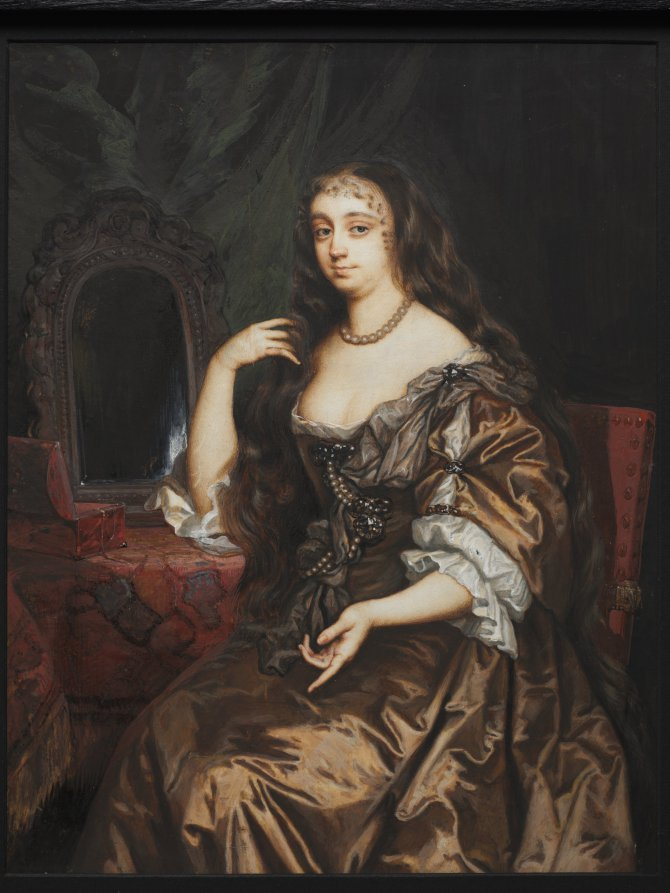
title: Portrait of Anne Hyde, Duchess of York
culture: England, 17th century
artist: Nicholas Dixon (British, c. 1708)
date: c. 1662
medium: watercolor on vellum in a large wooden frame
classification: Portrait Miniature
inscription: Label inside of back: Henry J. Murcott, London. Written in ink on backing: "Anny Hyde, first Wife of James II, Mother of Queen Mary II, Queen Anne. From Lord Currie's collection."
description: Though knowledge about his birth and training remain obscure, Nicholas Dixon is known to have been a favorite miniature painter of the English court at the close of the seventeenth century. He succeeded Samuel Cooper (1608/9–1672) as limner to King Charles II in 1673 and was Keeper of the King’s Picture Closet, for which he was granted an irregularly paid annuity of £200. Dixon painted a substantial number of ambitiously scaled miniatures—which became increasingly uncommon among practitioners of the art form when the more constrictive support of ivory supplanted vellum in the early 1700s. Dixon often signed his work with the monogram ND, and many of his large cabinet miniatures were copies of portraits, religious scenes, and mythological paintings by old masters, thirty of which formed part of the collection of the dukes of Portland. Among the characteristics of his style are ruddy flesh tones and drowsy eyes, and like the work of John Hoskins (c. 1590–1665), who may have been his teacher, Dixon favored softer modeling and diffuse lighting of his subjects, as opposed to the dramatic shadows employed by Cooper. Two lottery schemes—one in 1684/85 and the other in 1698— involving the exhibition of miniatures and the distribution of cash prizes proved disastrous for Dixon, who was in financial ruin by 1700 and constrained to sell a large number of works from the lottery. Anne Hyde (1637–1671), the sitter in this portrait, was around the age of twenty-four when the miniature was painted. She faces right and sits upon a dull red chair before a dressing table covered with a deep red embroidered cloth or tapestry that is fringed at the edges. A mirror and open jewel box lie on a table that is in front of a dark green curtain. The sitter has gray eyes and wears a golden brown satin décolleté dress with white ruffled undersleeves ornamented with jeweled closures. A necklace of large pearls hangs around her neck, and jeweled brooches fasten a winding rope of pearls to the bodice of her gown. Her right elbow rests on the table, and her fingertips comb through her long, wavy brown hair, which falls over her shoulders to below her waist. Her left arm extends toward her knee as she lightly holds a measure of her sash under her thumb while pointing downward with her index finger. The gracefully arranged, tapered fingers indicate Restoration court refinement.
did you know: This portrait is after a well-known and frequently copied oil painting by Peter Lely; it is nearly identical but with crimson and gold drapery in place of the dressing table and mirror.